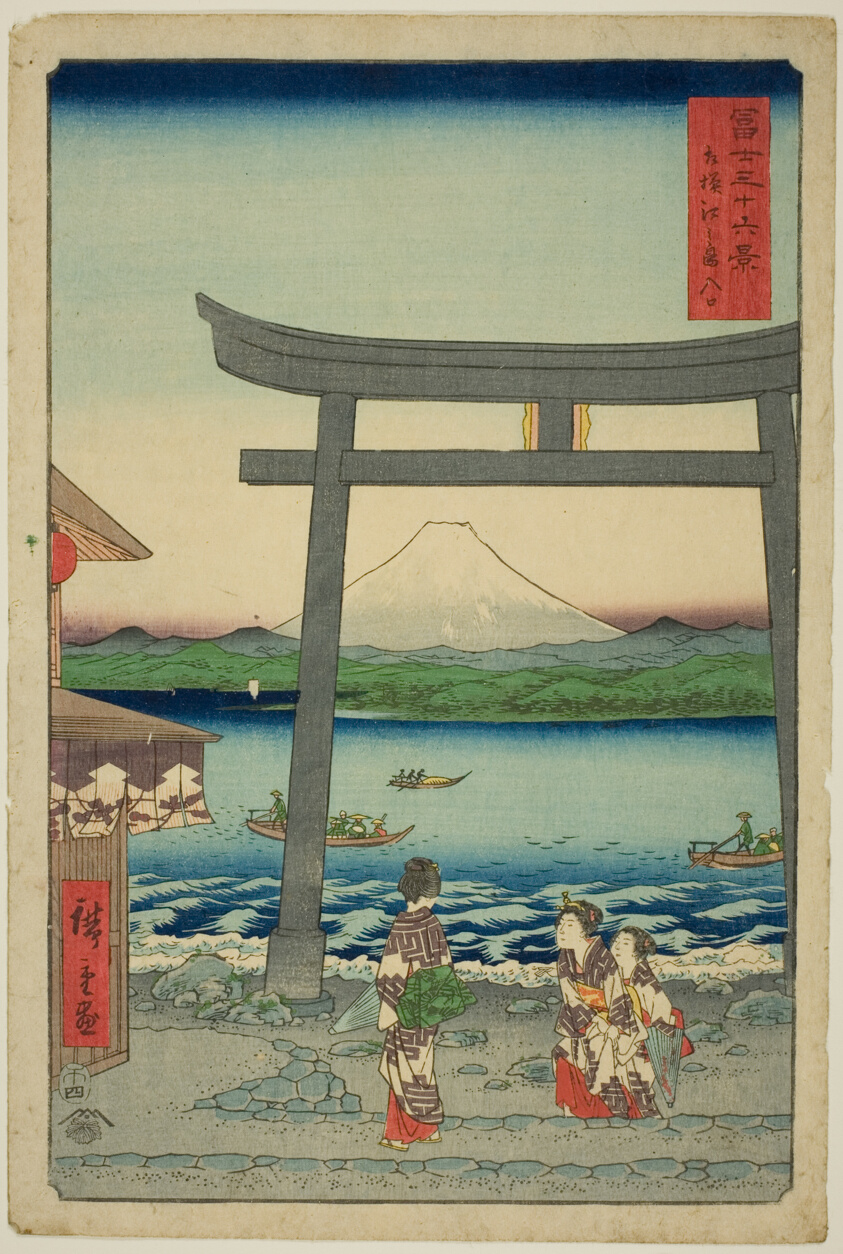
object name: Print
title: Entrance To Enoshima in Sagami Province (Sagami Enoshima iriguchi), from the series "Thirty-six Views of Mount Fuji (Fuji sanjurokkei)"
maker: Utagawa Hiroshige 歌川 広重; Japanese, 1797-1858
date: 1858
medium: Color woodblock print; oban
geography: Japan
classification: woodblock print; print; asian art